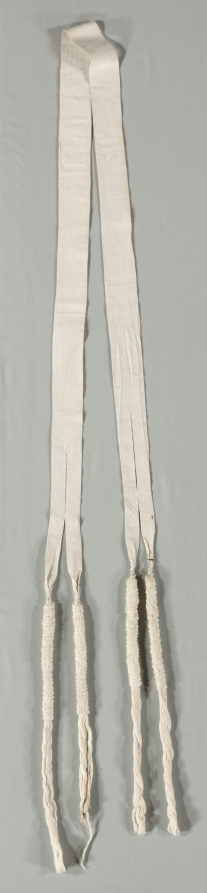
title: Band with Tassels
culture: Peru, North Coast, Chimú style, 1200-1460s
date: 1455–1625 (radiocarbon date, 95% probability)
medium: cotton; weft-faced plain weave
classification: Garment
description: This garment may have been found with others in the collection that formed a matched set worn by a noble of the Chimú, who rose to power on Peru’s north coast after the year 1000.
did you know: The Chimú forged an empire that thrived until the 1460s, when the Inka incorporated it into their own imperial domain.